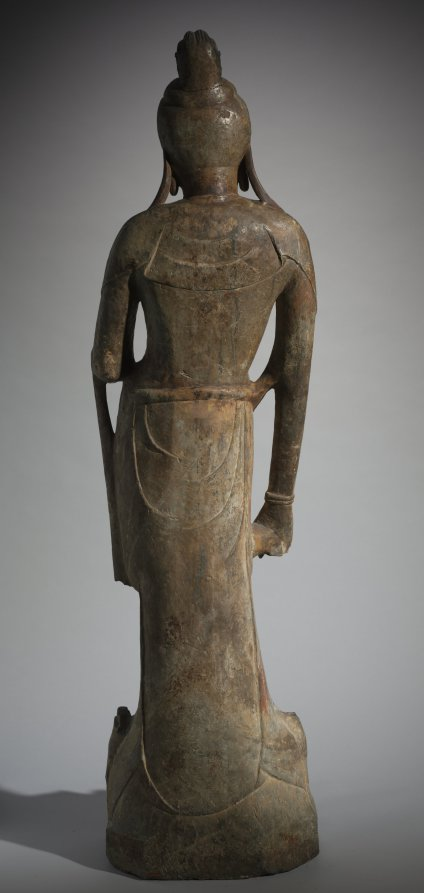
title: Standing Guanyin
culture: China, Tang dynasty (618-907)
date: 700s?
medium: limestone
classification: Sculpture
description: The statue is identified and dated by an inscription to 687. There is a marked restraint and stately elegance of the well-proportioned figure standing in a relaxed pose.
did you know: The statue retains a good deal of old polychrome.